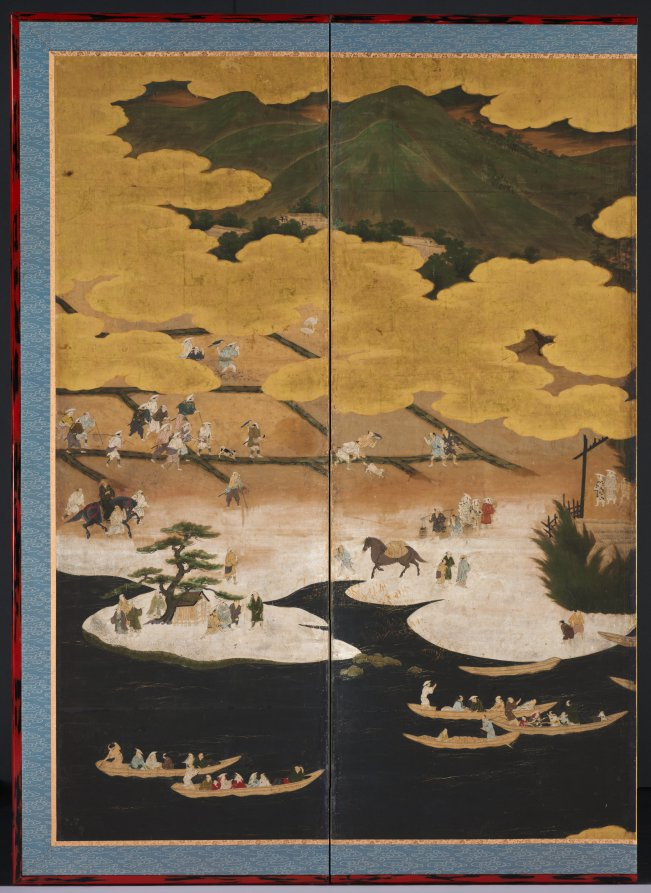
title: Famous Views of Ōmi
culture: Japan, Edo period (1615–1868)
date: 1660s–90s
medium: One of a pair of six-panel folding screens; ink, color, and gold on gilded paper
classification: Painting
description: Ōmi is an area around Lake Biwa near Kyoto. The Shinto shrine Hiyoshi Taisha and the Buddhist temple Ishiyamadera are in the upper right and upper left of the composition, respectively. At center is the pilgrimage route and people in the town before the temple gates. Harvested rice fields to the right and flowering cherry blossom trees at left show seasonal change from winter to spring.